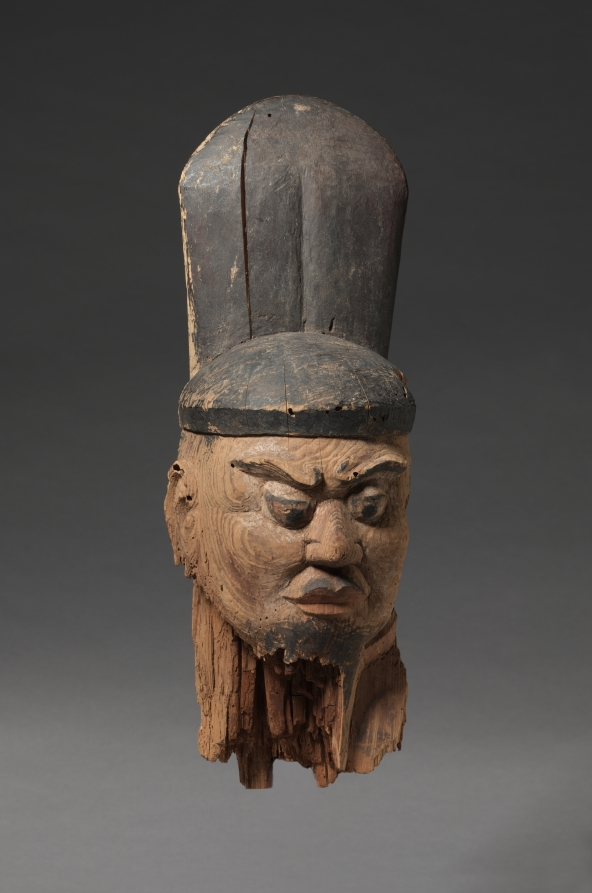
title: Head of a Male Shinto Deity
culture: Japan, Heian period (794–1185)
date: 900s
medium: wood with lacquer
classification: Sculpture